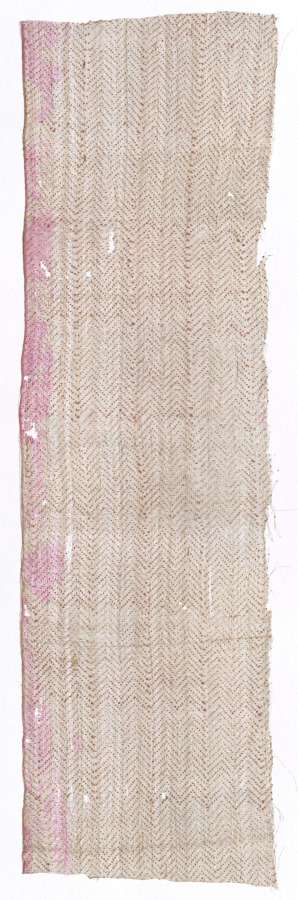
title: Fragment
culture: India, Mughal Period, 16th - 17th century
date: 1500s–1600s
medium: Block printed with gold leaf (varak) on undyed plain weave cotton muslin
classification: Textile